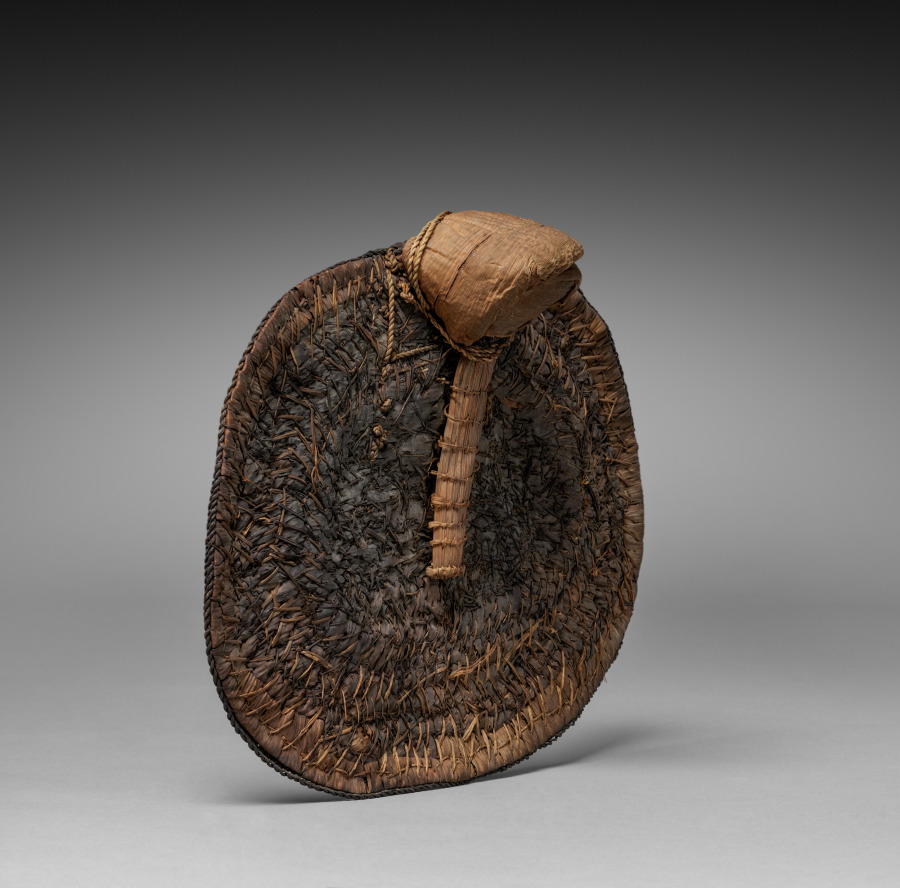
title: Back Skirt / Sitting Pad (negbe)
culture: Africa, Central Africa, Democratic Republic of the Congo, Mangbetu-style maker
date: before 1929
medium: Plant fibers and dye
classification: Garment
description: Egbe (singular: negbe) were fashionable and practical garments aristocratic Mangbetu women made for special occasions. Worn over a skirt, it tied onto a girdle along with a frontal “apron.” The curved interior piece rested on the lower back. Thickly woven, flexible natural fibers bent with the body, cushioning the wearer’s behind when sitting. When the woman was standing, the decorated flat portion faced outward, showing off bold geometric motifs. Egbe were among items sold to foreigners at the Mangbetu king’s encouragement as the Mangbetu actively constructed their self-image for outsiders during the 1920s and 1930s.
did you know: A contemporary fashion in 1929, when it was purchased or collected, this negbe is now a historical document of past styles.